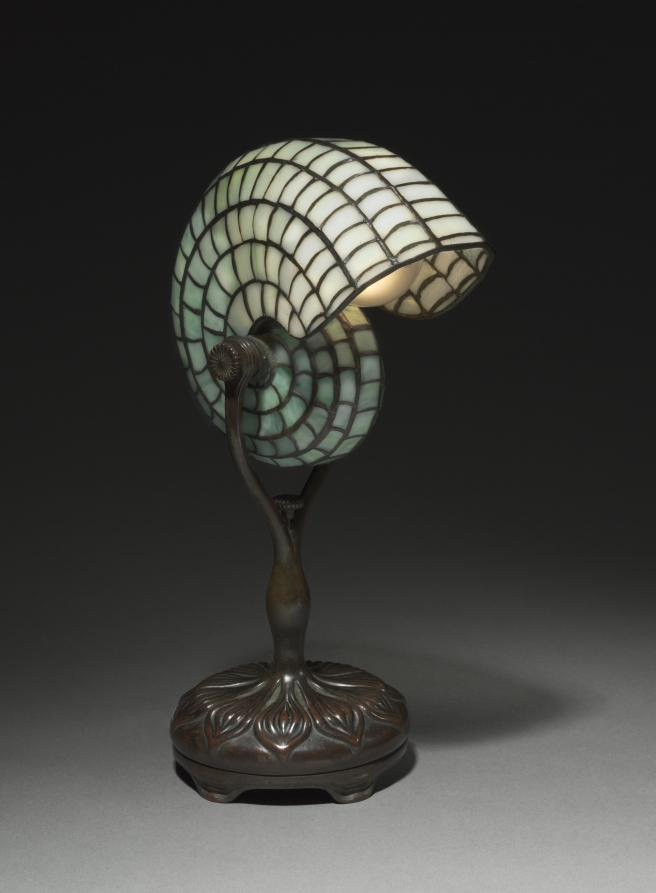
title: Nautilus Reading Lamp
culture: America, early 20th Century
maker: Tiffany Glass & Decorating Company (America, New York, 1892–1902)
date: c. 1899–1902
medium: bronze, leaded glass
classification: Metalwork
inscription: stamped on underside: Tiffany Studios/New York/25891/TDGCo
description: Benjamin Hubbell, the architect of the Cleveland Museum of Art, acquired this vase from Louis Comfort Tiffany, with whom he collaborated on various projects. The shape of the nautilus shell provides the perfect space to conceal a light bulb, the newest form of technology at the time. As a result, this lamp was a critical success and sold both in this original form and with the later alteration of a bronze mermaid for the stand and an actual nautilus shell for the shade.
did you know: A lamp of this design was first featured in Siegfried Bing's 1899 display of Louis Comfort Tiffany's designs at the Grafton Galleries in London then in Tiffany's own stand at the 1900 Paris Exposition Universelle.